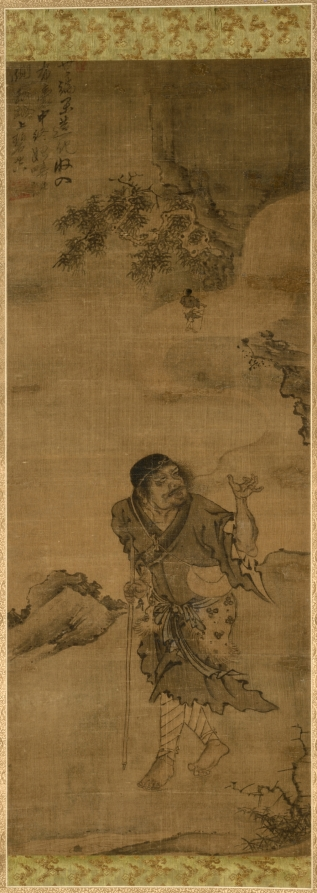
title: Li Tieguai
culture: China, Yuan dynasty (1271-1368)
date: 1300s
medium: Hanging scroll; ink and color on silk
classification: Painting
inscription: Inscribed in upper left corner: The universe which has no limit/ Is all collected in the cloth bag/ At the roadside which has no beginning or end/ One floats up to the blue sky.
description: It is said that Li Tieguai’s ethereal self visited the deified Laozi but when he returned, he found that his own body was burned. He had to inhabit the corpse of a person who used a crutch to walk, and thus gained his name Tieguai—the Iron Crutch. The painting depicts Li Tieguai after he took possession of the body, with the iron staff in his hand. As Li exhales, he blows a small Li Tieguai in the air, showing the immortal’s ability to send his spirit on journeys.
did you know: Li Tieguai is one of the Eight Daoist immortals.